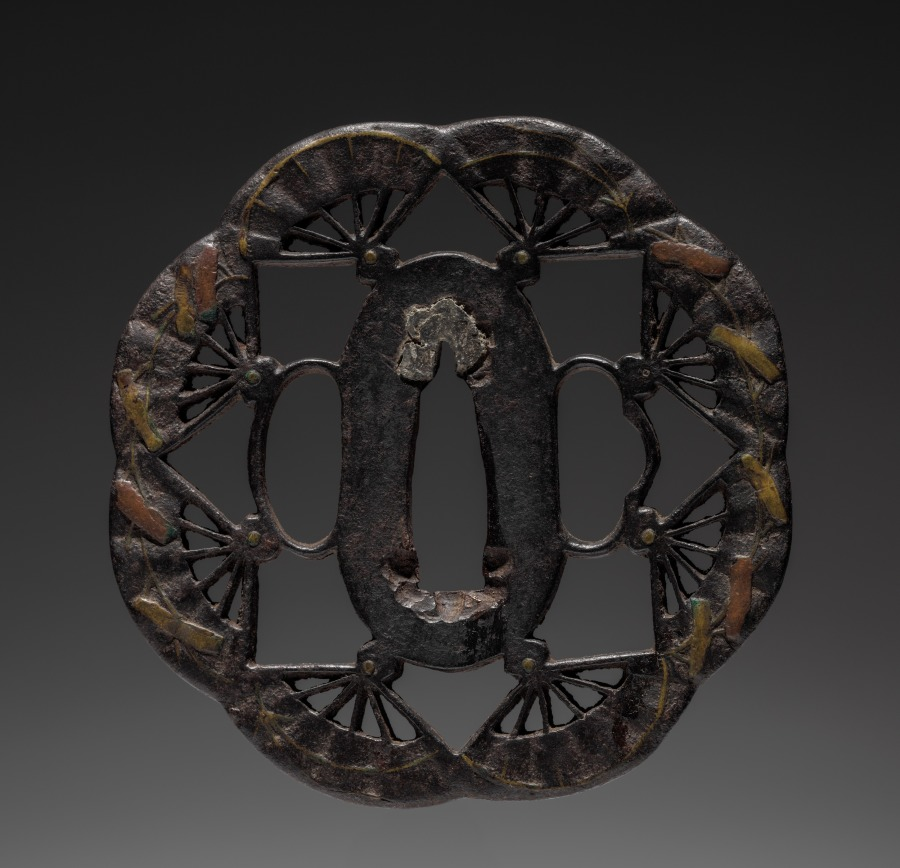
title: Sword Guard (Tsuba) with Fans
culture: Japan, possibly Edo period (1615-1868)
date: c. 1615–1868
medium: iron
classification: Arms and Armor